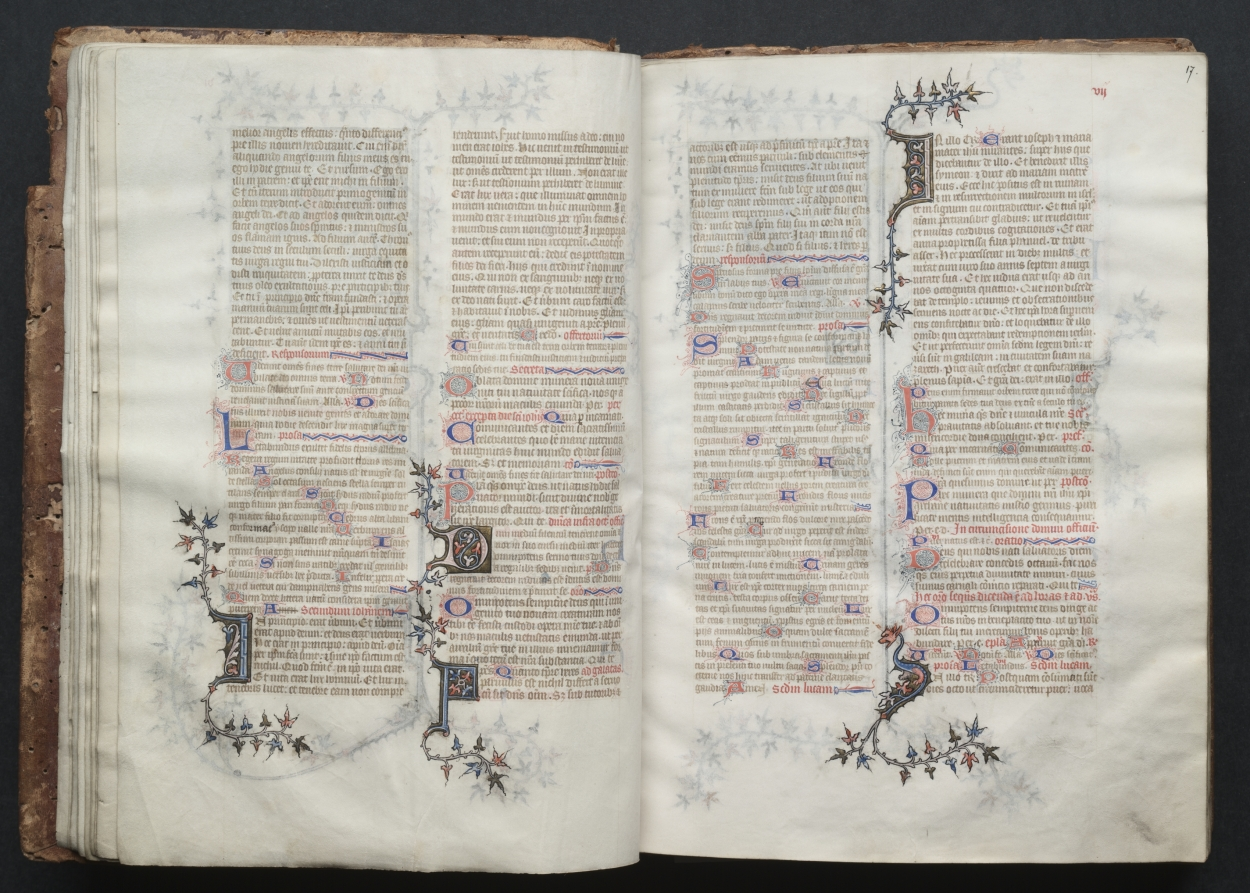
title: The Gotha Missal: Fol. 16v, Text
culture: France, Paris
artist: Master of the Boqueteaux (French)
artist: and Workshop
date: c. 1375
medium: ink, tempera, and gold on vellum; blind-tooled leather binding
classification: Bound Volume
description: The style and quality of this manuscript's decoration is typical of deluxe Parisian books made for aristocratic or royal patrons. Most of the book's decoration appears to be the work of the Master of the Boqueteaux, an artist active at the court of King Charles V (died 1380). His style was apparently shared by a number of book illuminators working in and around Paris. It is very possible that the Gotha Missal belonged to Charles V, but is not provable because the manuscript has no royal portraits and lacks a colophon. Given the book's magnificent decoration, however, it would seem that it was produced for a Valois prince, if not for the king himself. The manuscript receives its name from the German dukes of Gotha, its later owners.